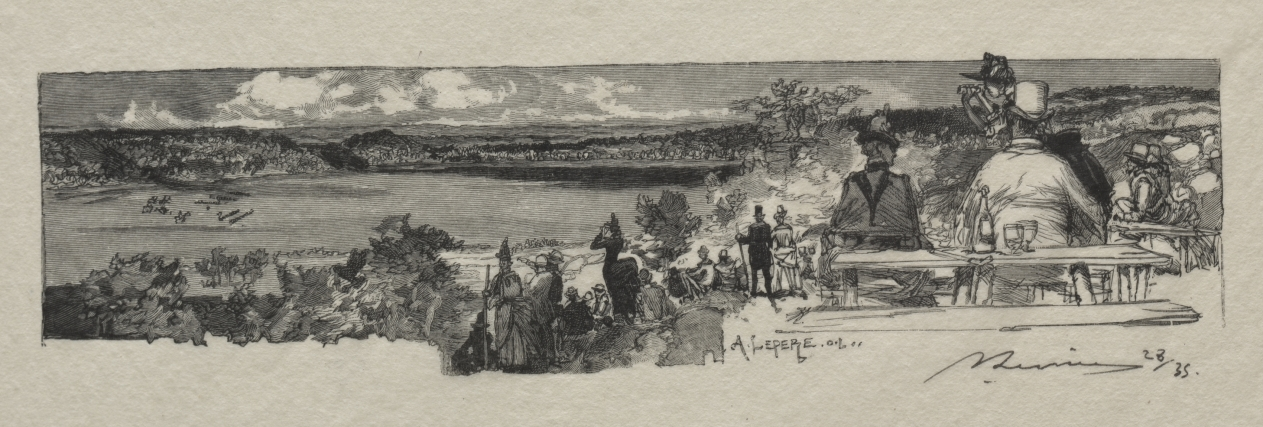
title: La Vallee de la Solle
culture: France, 19th-20th century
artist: Auguste Louis Lepère (French, 1849–1918)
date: 1890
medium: wood engraving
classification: Print